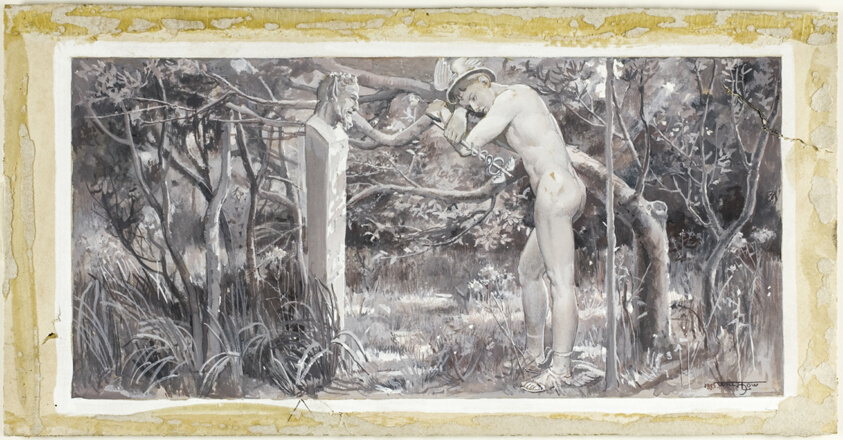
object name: Drawing and Watercolor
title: And So He Rested on the Lonely Ground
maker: Will Hicock Low (American, 1853-1932)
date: 1885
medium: Brown and gray gouache, heightened with touches of white gouache, on cream wood-pulp laminate board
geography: United States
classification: drawings (visual works); prints and drawing